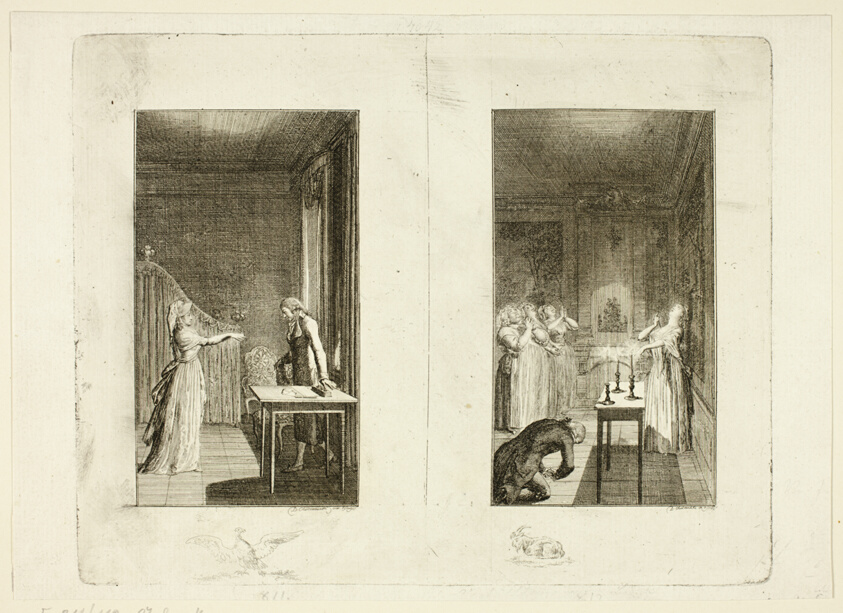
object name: Print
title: Illustration to Samuel Richardson's Clarissa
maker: Daniel Nikolaus Chodowiecki (German, 1726-1801)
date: 1796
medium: Etching on paper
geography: Germany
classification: etching; print; prints and drawing